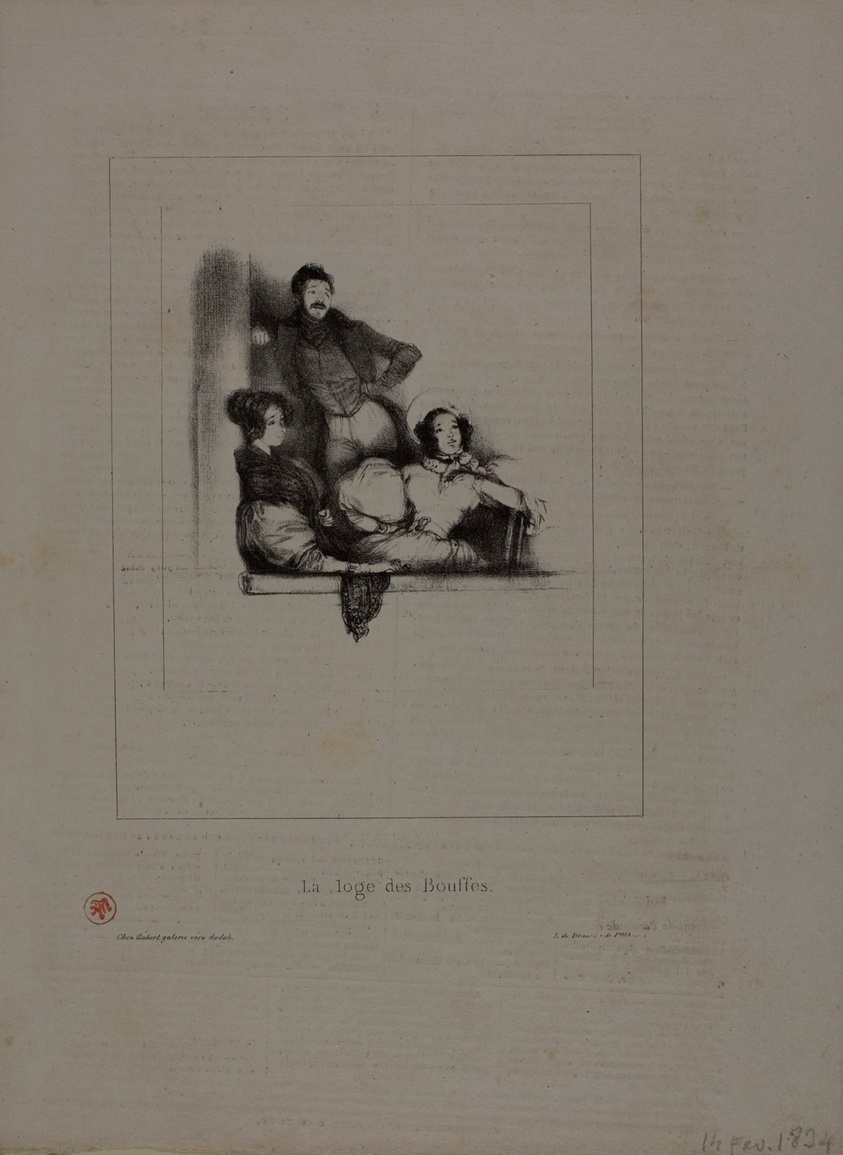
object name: Print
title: The Comics' Theatre-Box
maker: Paul Gavarni (French, 1804-1866)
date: 1834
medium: Lithograph in black on ivory wove paper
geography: France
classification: lithograph; print; prints and drawing